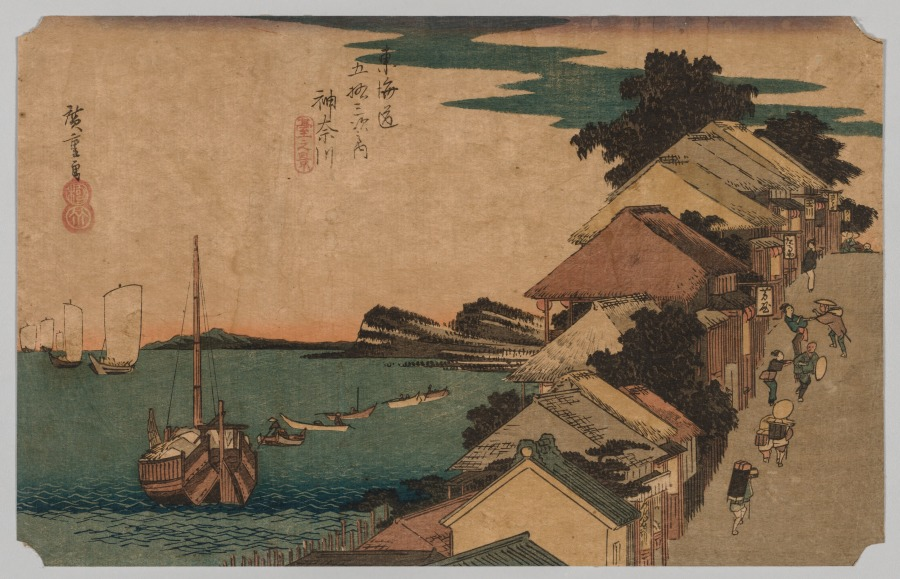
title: Kanagawa, Inland Sea: Top of the Street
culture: Japan, Edo period (1615–1868)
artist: Utagawa Hiroshige (Japanese, 1797–1858)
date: 1797–1858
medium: color woodblock print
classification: Print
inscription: Signature: Hiroshige gwa (two characters signature of middle period) Publisher Seal: Take